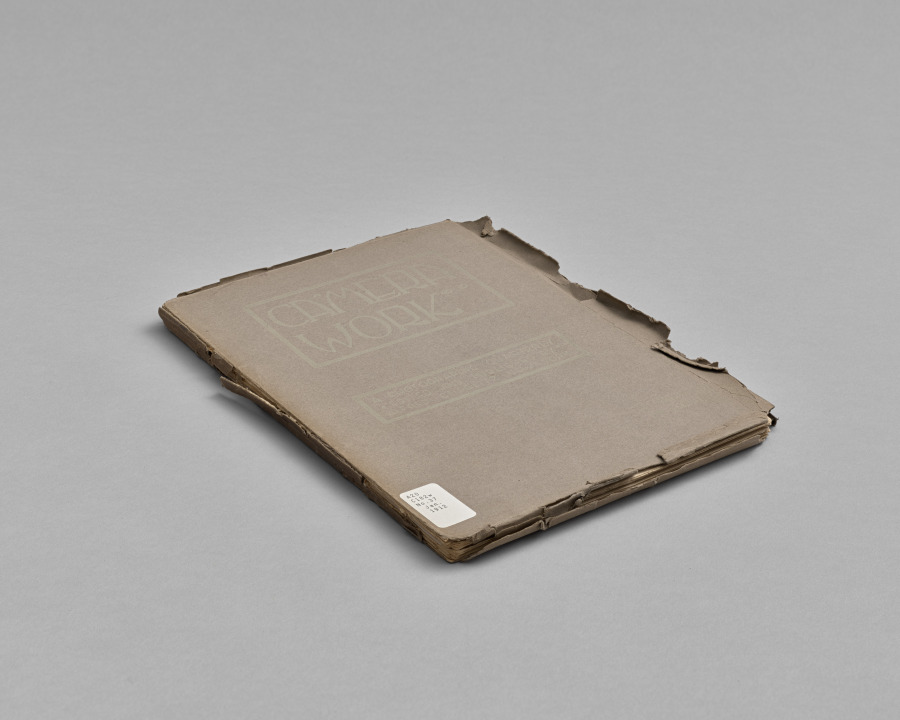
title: Camera Work: Number 37, January 1912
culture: England, 20th century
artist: David Octavius Hill (British, 1802–1870)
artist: and Robert Adamson (British, 1821–1848)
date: 1912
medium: photogravure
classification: Bound Volume